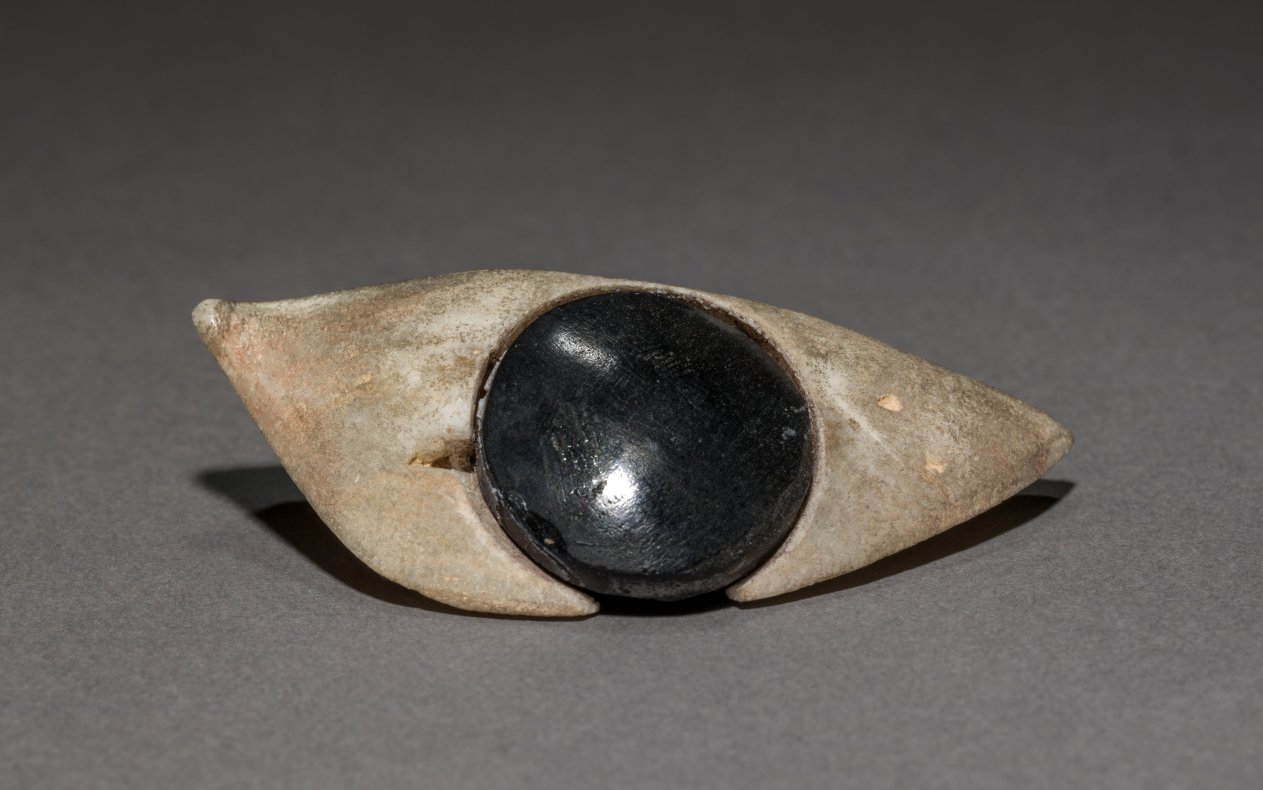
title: Inlay Eye from Coffin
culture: Egypt, Middle Kingdom (2040–1648 BCE), Dynasty 12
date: 1980–1801 BCE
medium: travertine and obsidian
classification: Funerary Equipment